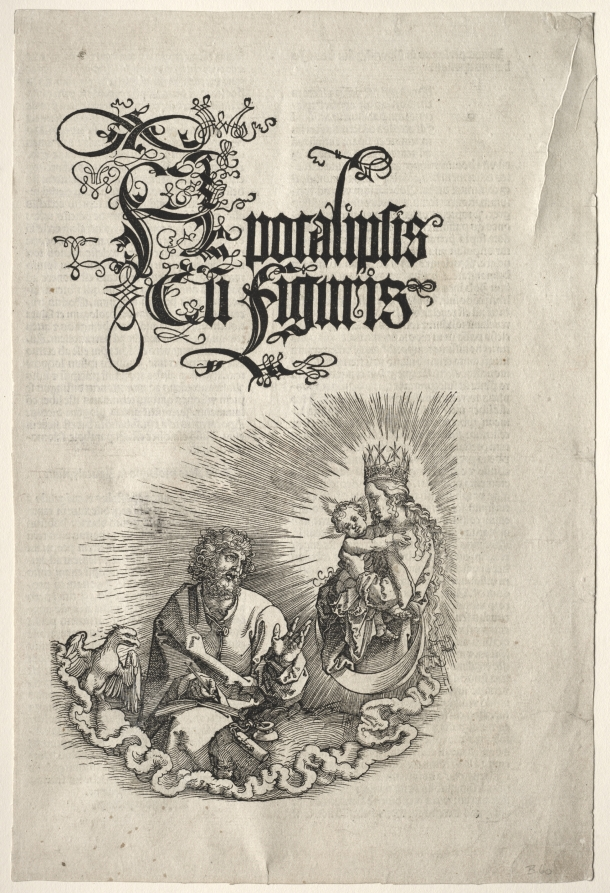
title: Revelation of St. John: Title Page to the Apocalypse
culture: Germany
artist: Albrecht Dürer (German, 1471–1528)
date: 1511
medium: woodcut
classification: Print